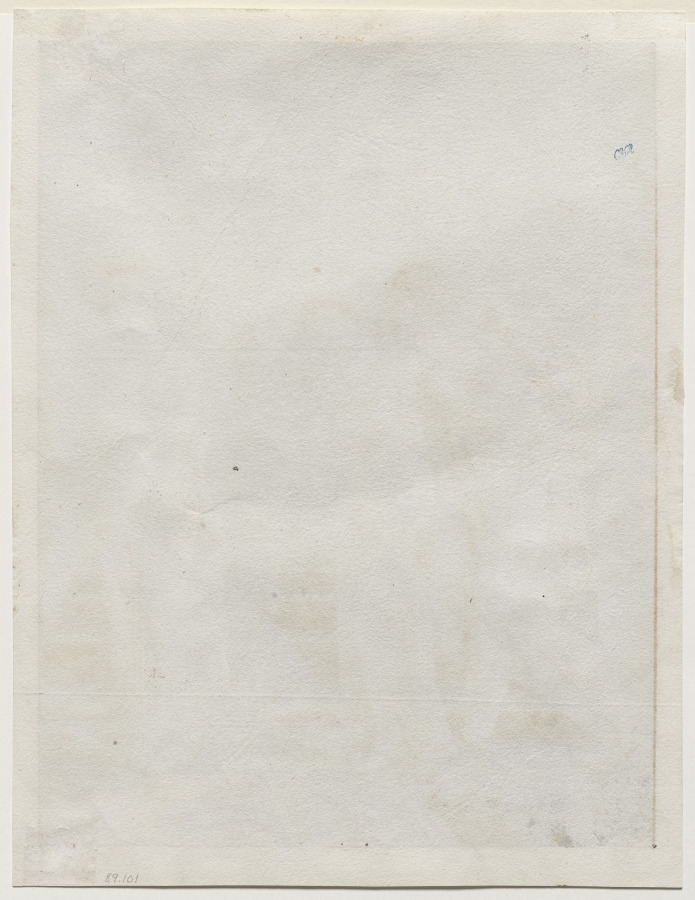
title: The Meeting of Orestes and Hermione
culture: France, early 19th Century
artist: Anne-Louis Girodet de Roucy-Trioson (French, 1767–1824)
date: c. 1800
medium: pen and brown and black ink, point of brush and brown and gray wash, with black chalk and graphite, heightened with white gouache, on cream wove paper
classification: Drawing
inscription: signed, lower left, in brown ink: ALG [artist’s monogram] / INV.; lower left, in black chalk: A L GIRODET INV.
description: When the French painter Jacques-Louis David was approached to work on a new edition of Jean Racine’s plays, he passed the task to his pupil Girodet, who excelled at illustrating literature. This highly refined drawing depicts a scene from Racine’s Andromaque, a complicated story of unrequited love and political treachery. Cléone introduces the love-blind Orestes to Hermione, who exploits his affection to make him do her bidding. Girodet skillfully contrasts Orestes’s eagerness and Hermione’s calculating character. With folded arms, she turns away, as if a statue between the columns of a cool marble interior. Yet Hermione’s sly, backward glance alerts the viewer of her cunning manipulation, which eventually drives Orestes mad.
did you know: The leg of the table behind Hermione has the form of a siren, a dangerous mythological creature that destroys anyone who hears its song.